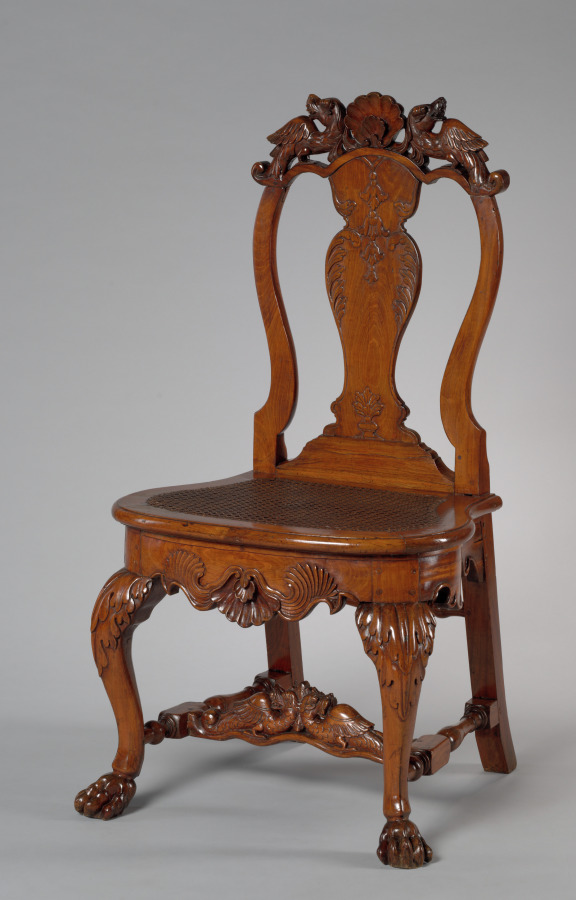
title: Side Chair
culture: Netherlands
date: 1705–15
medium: tulipwood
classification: Furniture and woodwork